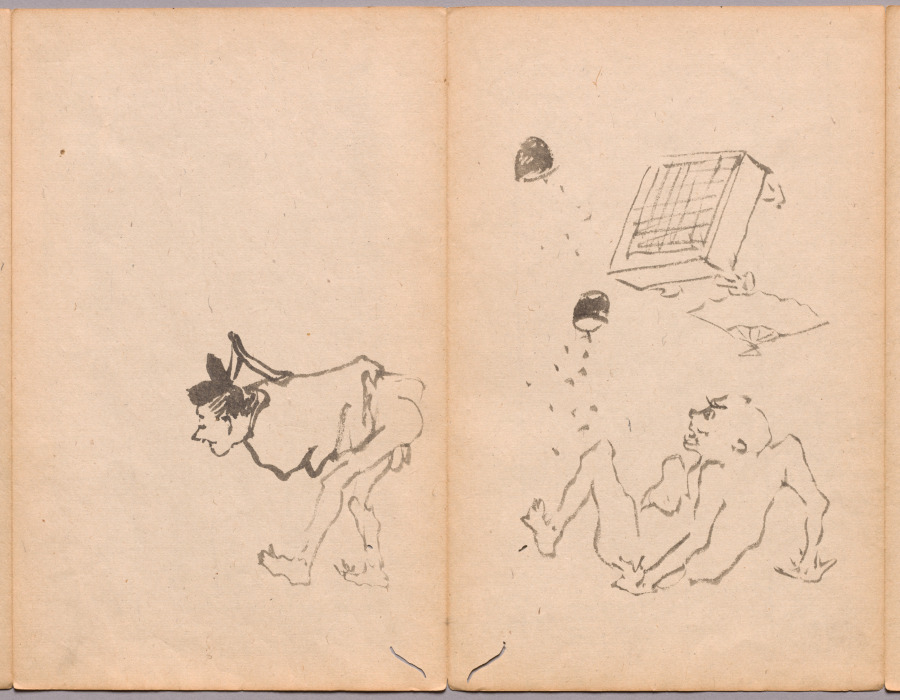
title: Farting Upsets a Game of Go from Sketch Album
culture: Japan, Edo period (1615–1868) to Meiji period (1868–1912)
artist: Kawanabe Kyōsai (Japanese, 1831–1889)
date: mid- to late 1800s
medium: Accordion-style book of 26 double-leaves; ink and color on paper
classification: Bound Volume